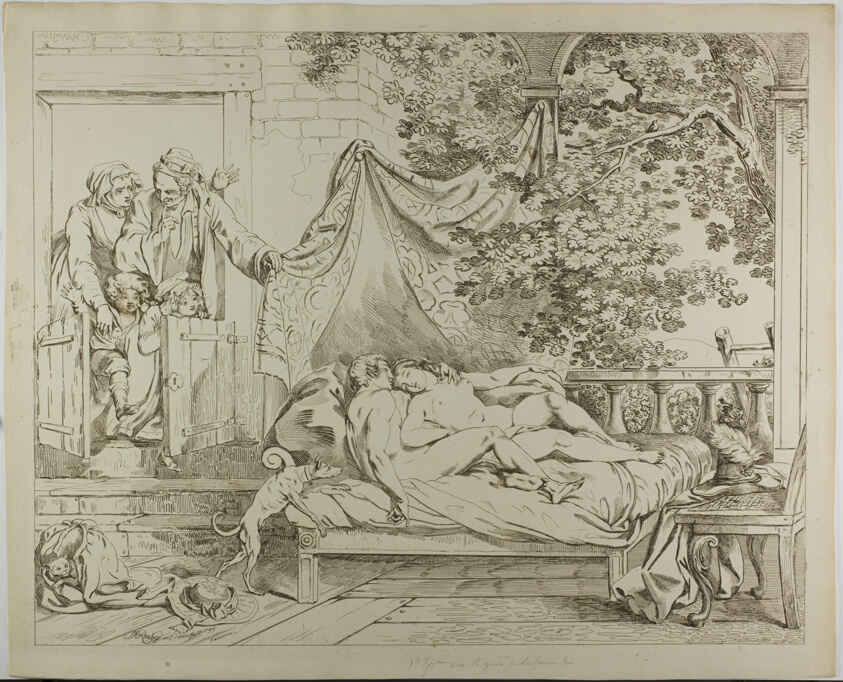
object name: Print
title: The Lovers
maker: Johann Heinrich Ramberg (German, 1763-1840)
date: 1799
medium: Pen lithograph in brown on cream wove paper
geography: Germany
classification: lithograph; print; prints and drawing